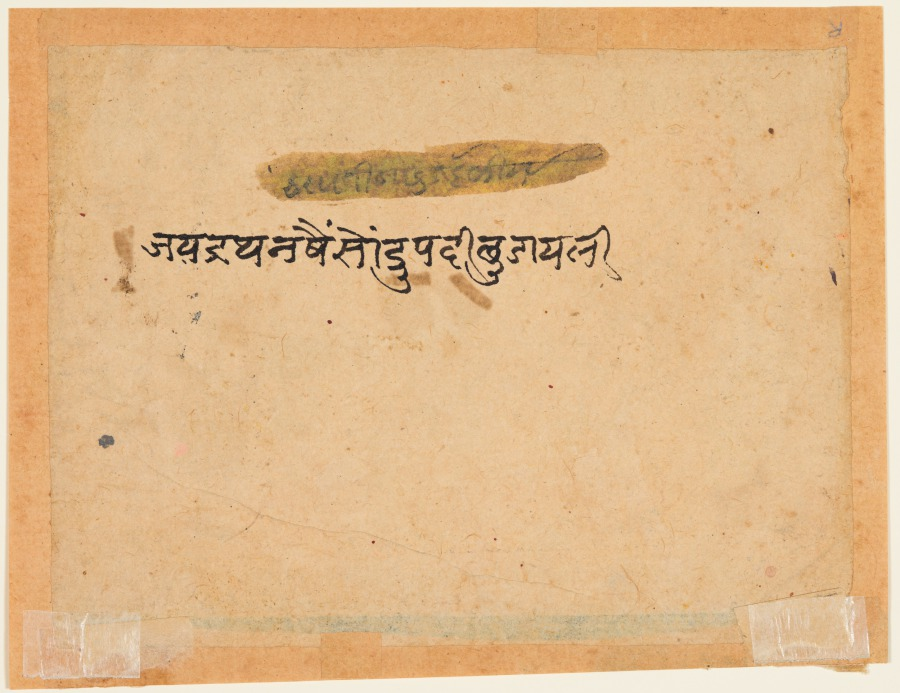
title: Draupadi Rescued from Abduction, from a Mahabharata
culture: Northern India, Popular Mughal School, probably done at Bikaner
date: c. 1615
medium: gum tempera, ink, and gold on paper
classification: Painting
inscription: jayadratha na kaiṃsoṃ dūpadī chuḍāyalī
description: Bhima and Jayadrath, dressed like wrestlers, duel while his four brothers (Pandavas) and their noble attendants look on. Bhima appears to be the wrestler taller in stature and wears a necklace of bells, and Jayadratha is the one wearing an orange loincloth. Draupadi stands behind Bhima, already being rescued from Jayadratha’s clutches.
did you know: Draupadi had five husbands, the Pandava brothers.